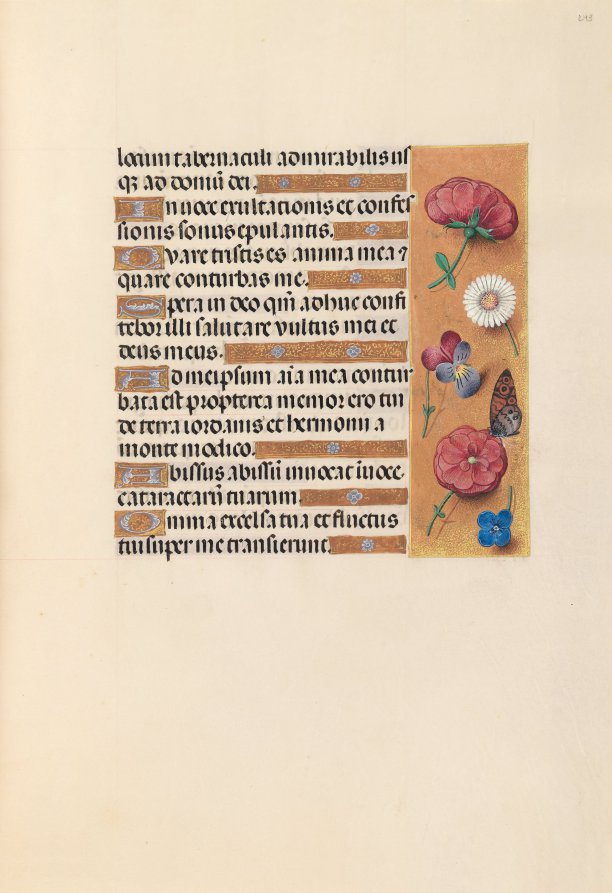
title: Hours of Queen Isabella the Catholic, Queen of Spain: Fol. 243r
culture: Flanders, Ghent and Bruges, late 15th century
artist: Master of the First Prayerbook of Maximillian (Flemish, c. 1444–1519)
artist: and Associates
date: c. 1500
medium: ink, tempera, and gold on vellum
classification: Bound Volume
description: This manuscript was illuminated by a circle of at least five highly organized manuscript painters active in the Flemish cities of Ghent and Bruges. The principal illuminator was Alexander Bening, who painted the majority of the book's miniatures. Manuscripts produced by this circle of artists are renowned for the decoration of their borders, which typically feature a rich variety of realistically-painted flowers, birds, and butterflies. This prayer book, called a book of hours, was intended not for a cleric, but for the private devotions of a lay person-in this case, Isabella the Catholic, Queen of Spain (1451-1504). Isabella's coat of arms embellishes the book's frontispiece. It is unlikely that the book was commissioned by the Queen herself; rather, she probably received it as a diplomatic gift from someone courting her patronage, perhaps Cardinal Francisco Jimenez de Cisneros. A Franciscan friar, Jimenez was dependent upon Isabella for his advancement, first to the post of Queen's confessor in 1492, and then to Archbishop of Toledo in 1495.